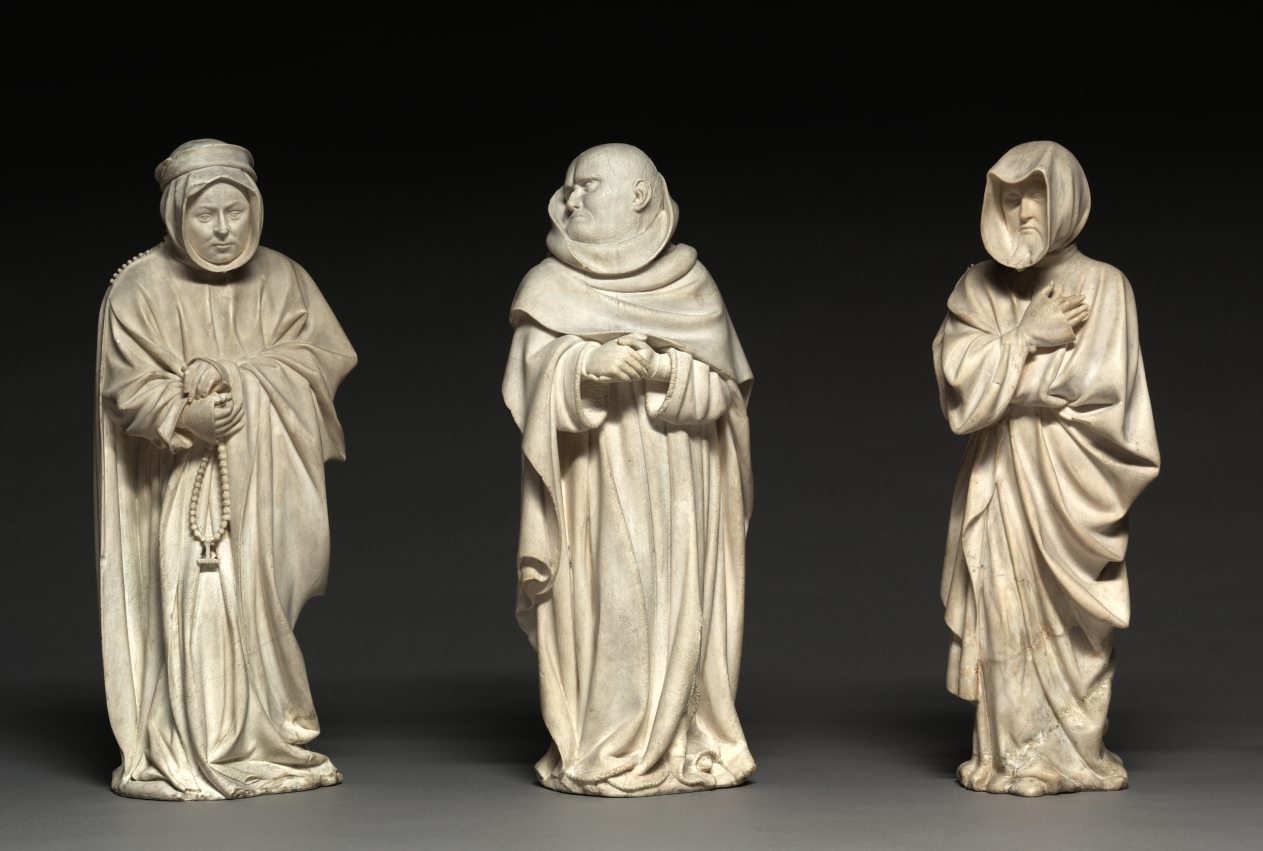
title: Mourner from the Tomb of Philip the Bold, Duke of Burgundy (1364–1404)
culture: Netherlands, active Dijon, 15th century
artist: Claus de Werve (Netherlandish, 1380–1439)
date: 1404–10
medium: vizille alabaster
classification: Sculpture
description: This figure comes from the tomb of Duke Philip the Bold from the church of Champmol near Dijon (Burgundy, France). Philip, who founded the monastery and designated it as his burial place, hired the best artists, many of whom came from the Netherlands. While the commission was given in 1381, the work was not completed until 1410, six years after the duke’s death. This mourner is unusual for the time because it is not carved as a static low relief on the pedestal of the tomb but interacts with the viewers and their fellow procession members. The lifelike quality of the figure is due in large part to the alabaster. Its softness allowed artists to carve details into the material, and the transparent, milky white stone could also be polished to a high gloss.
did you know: A plaster cast of this mourner decorates the empty niche in the Tomb of Philip the Bold in Dijon, France.